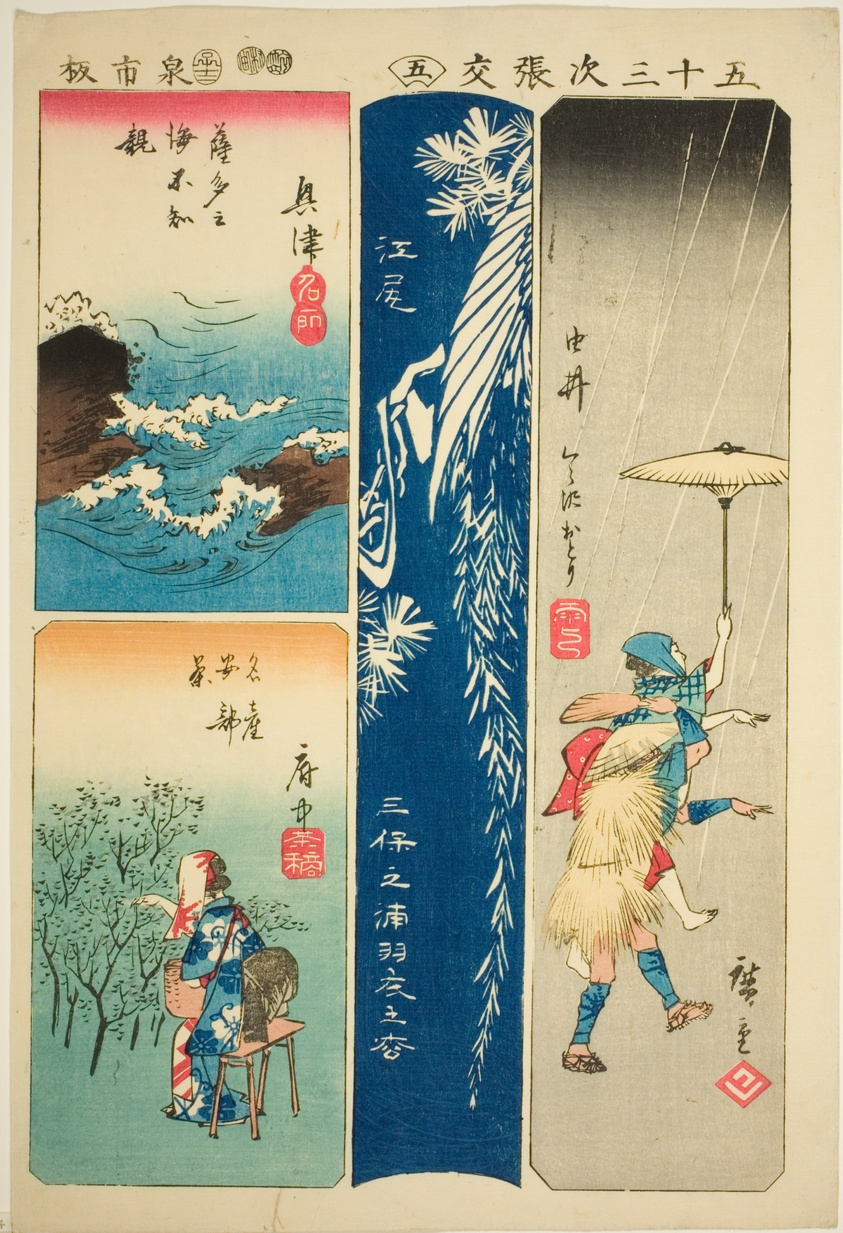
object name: Print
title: Okitsu, Ejiri, Yui, and Fuchu, no. 5 from the series "Cutouts of the Fifty-three Stations (Gojusan tsugi harimaze)"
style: Japanese (culture or style)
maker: Utagawa Hiroshige 歌川 広重; Japanese, 1797-1858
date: 1852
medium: Color woodblock print; oban, harimaze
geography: Japan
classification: woodblock print; print; asian art